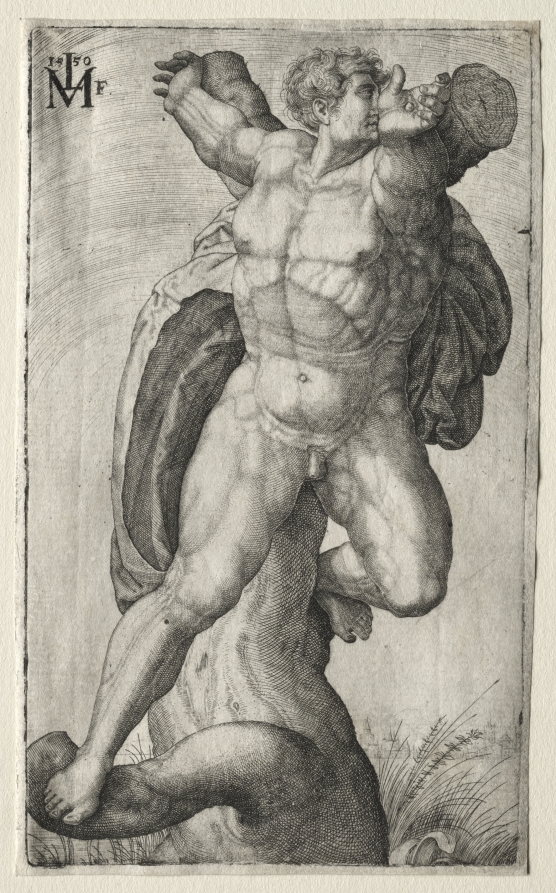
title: Crucified Man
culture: Germany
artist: Melchior Lorck (Danish, 1526/27–after 1588)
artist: after Michelangelo Buonarroti (Italian, 1475–1564)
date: 1550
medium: engraving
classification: Print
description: In this print Danish artist Melchior Lorck isolated the figure of the Old Testament villain Haman from Michelangelo’s Sistine Chapel ceiling. Lorck may have seen it in person, or in a print or drawing. He rendered the musculature and outline carefully, but less successful were his grasp of the figure’s foreshortening (the rendering of a figure in perspective), and the proportions of the body in relation to the head. Artists working outside Italy around 1550 still did not generally sketch from live models, nor did they directly study anatomy, which may explain Lorck’s awkward reconciliation of the form.